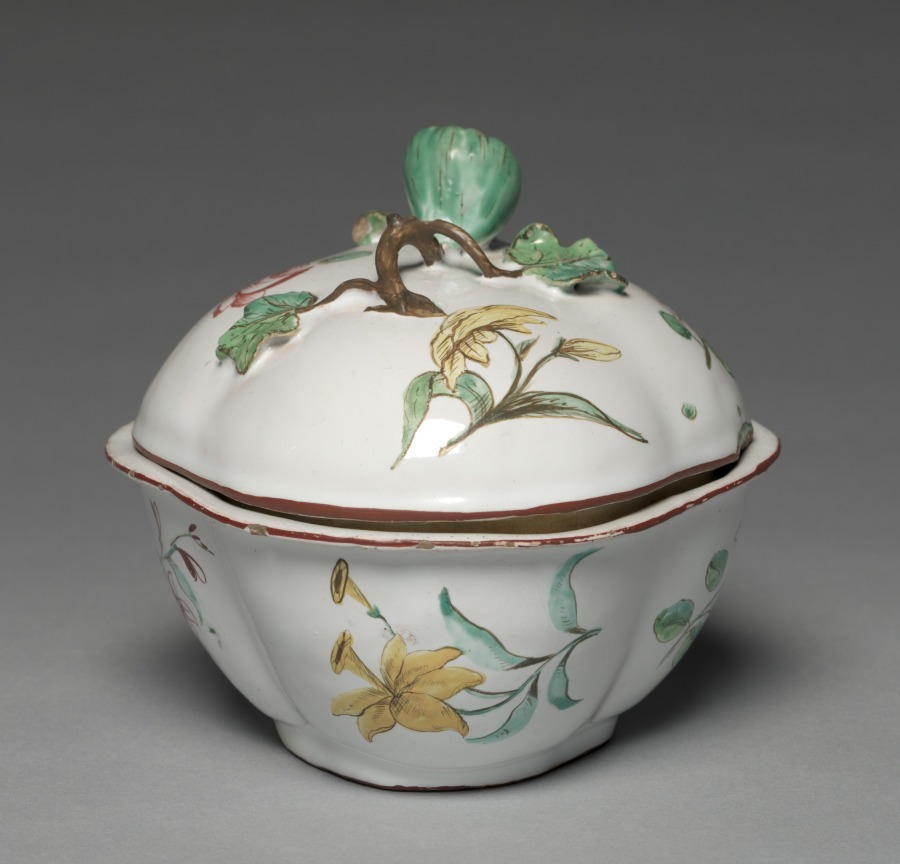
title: Sugar Basin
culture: France, 18th century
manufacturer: Sceaux Factory (French, active 1748–66)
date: c. 1750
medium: faience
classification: Ceramic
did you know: In medieval Italian churches, painted altarpieces served as a focal point for worshippers during the rituals of faith. The figures of Jesus, Mary, and eight saints are framed by a golden background that would have glistened in the flickering candlelight of the church.